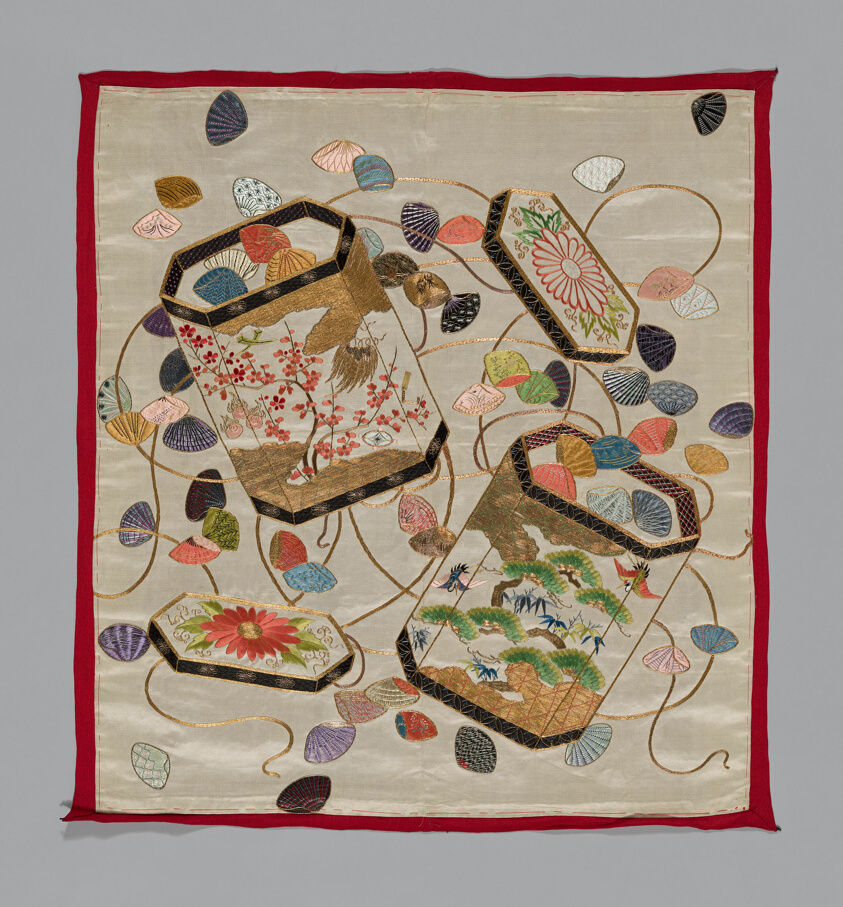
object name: Textile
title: Fukusa (Gift Cover)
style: late edo, edo (japanese period), Japanism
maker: Japan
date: Edo period (1615–1868), 1775/1800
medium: Silk, satin weave (shusu); embroidered with silk and gold-leaf-over-lacquered-paper-strip wrapped cotton in knot, satin, single satin, surface satin and stem stitches; laidwork and couching; relined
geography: Japan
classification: textile; costume; needlework (visual works)